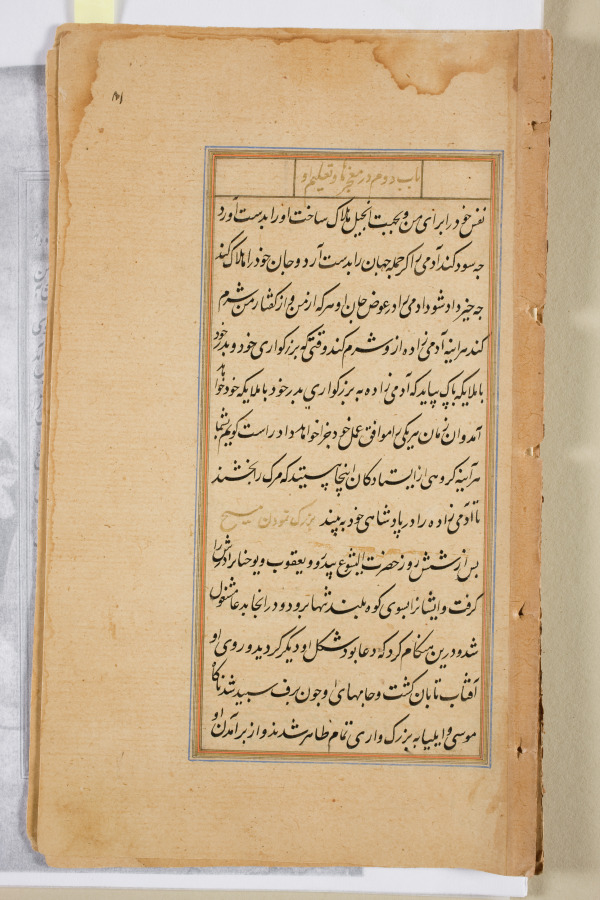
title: Text page from a Mirror of Holiness (Mir’at al-quds) of Father Jerome Xavier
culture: Mughal India, Allahabad, made for Prince Salim (1569–1627)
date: 1602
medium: Ink and gold on paper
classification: Manuscript